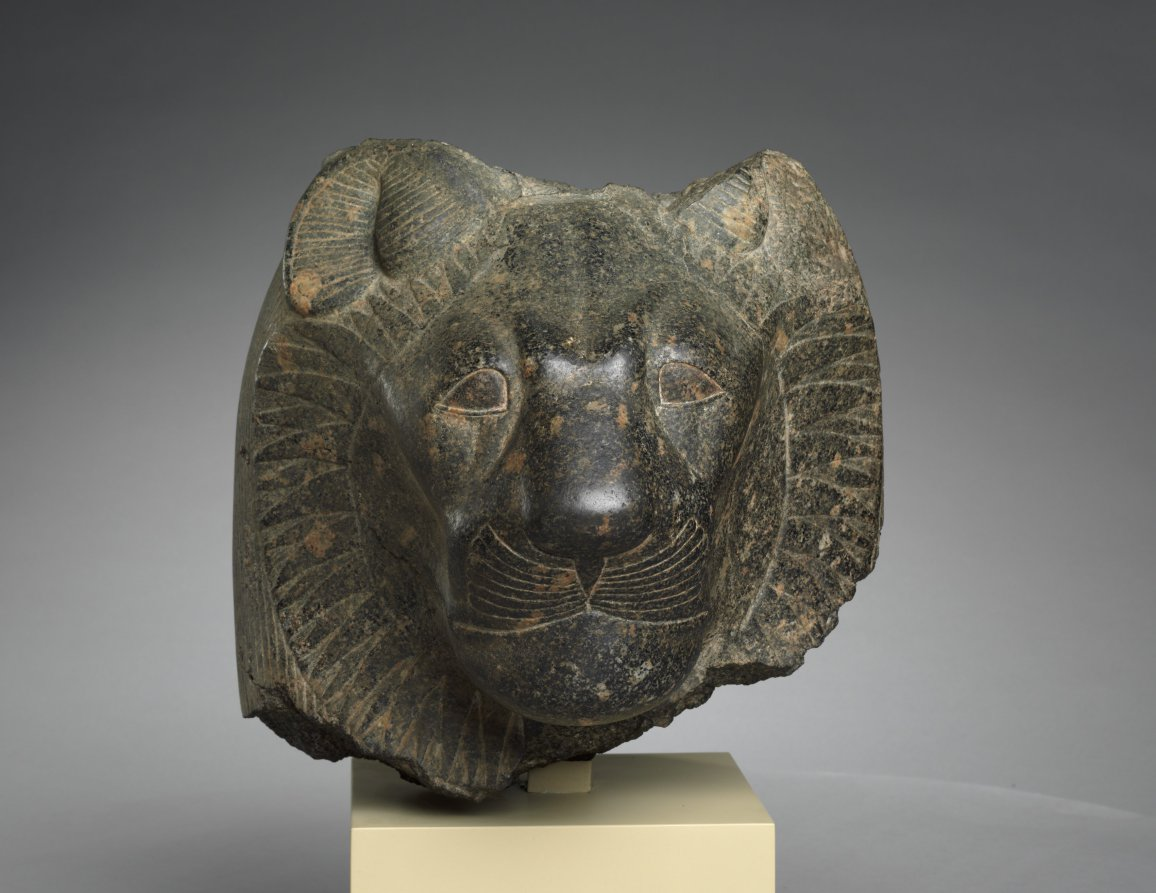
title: Head of Sekhmet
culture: Egypt, Thebes(?), New Kingdom (1540–1069 BCE), Dynasty 18, reign of Amenhotep III (1390–1352 BCE)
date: c. 1391–1353 BCE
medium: granodiorite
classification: Sculpture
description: This lioness head once belonged to a grand statue of the goddess Sekhmet, "the powerful one," probably seated and wearing a tight dress. Possibly appealing to her healing aspect, Pharaoh Amenhotep III, often described as “beloved of Sekhmet,” commissioned and dedicated hundreds of large granodiorite Sekhmet sculptures in his Theban mortuary temple. Thus, this head likely comes from Thebes, perhaps later moved across the Nile—like many such sculptures—to the temple of Mut, a related deity, at Karnak. Behind her stylized ruff, Sekhmet wears a wig, once crowned with a sun disk and uraeus, the stylized cobra symbolizing royal or divine power.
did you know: Amenhotep III may have dedicated 730 statues of Sekhmet, two for each day of the year.